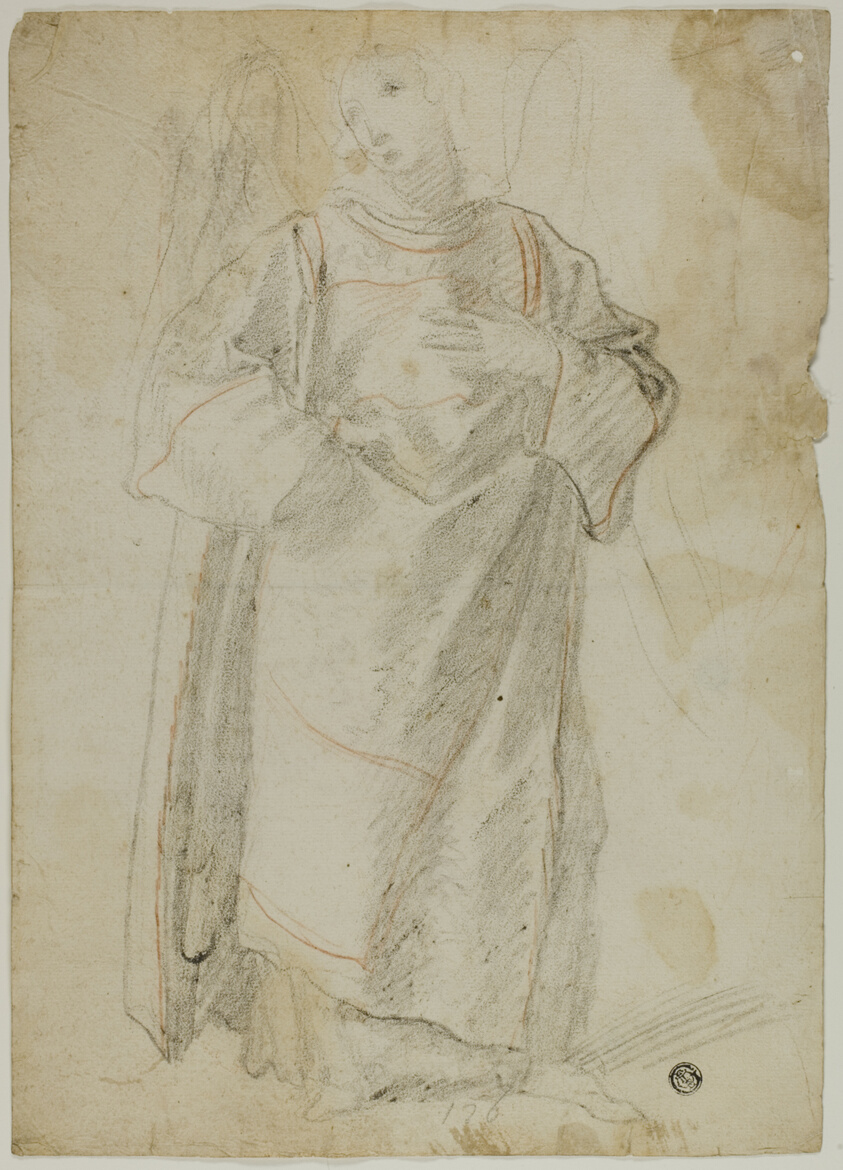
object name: Drawing and Watercolor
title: Standing Angel (recto); Study of Face and Drapery (verso)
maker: Probably Domenico Fiasella (Italian, 1589-1669); or possibly Bernardo Strozzi (Italian, 1581-1644); or possibly Lodovico Carracci (Italian, 1555-1619)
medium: Black and red chalk (recto), and red chalk (verso), on ivory laid paper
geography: Italy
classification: chalk; drawings (visual works); prints and drawing